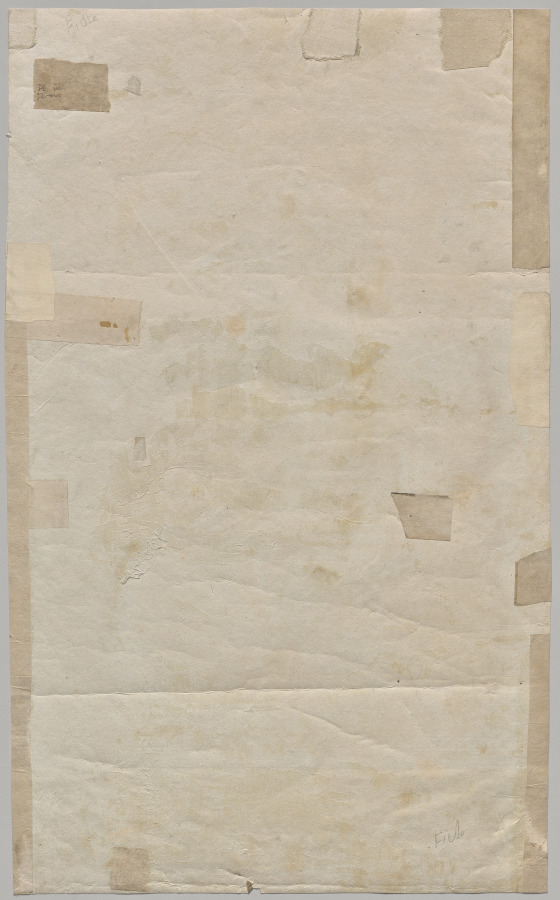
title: Two Beautiful Ladies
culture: China, Qing dynasty (1644–1911), Qianlong reign (1736–95)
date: 1736–95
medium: Polychrome woodblock print; ink and color on paper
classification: Print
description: In the 1600s, printing flourished in such Jiangnan cities as Nanjing, Suzhou, Hangzhou, and Huizhou, evolving from privately enjoyed illustrated books printed in color to more commercialized single-sheet color prints that were hung on walls and became part of the rich urban visual culture.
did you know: Woodblock printing in color reached a height in China in the 1600s to 1700s. The prints were executed by means of sets of separate blocks, each carved to print a different color.